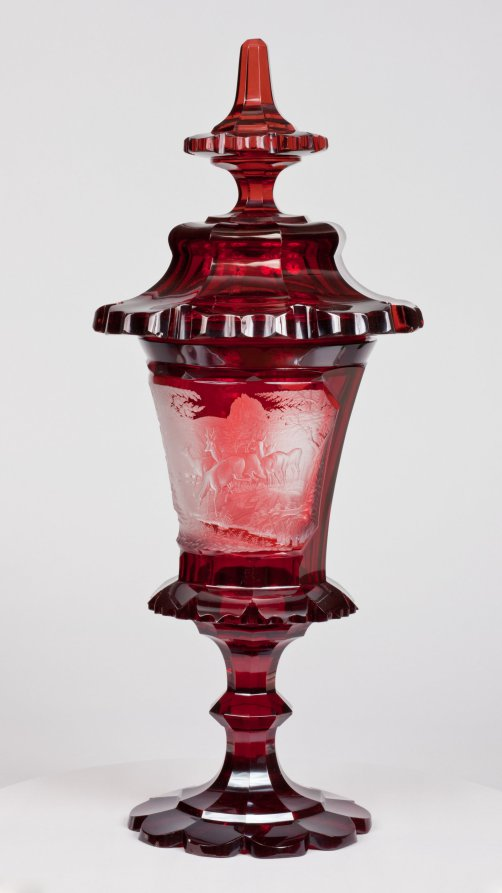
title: Covered Cup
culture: Bohemia, 19th century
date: mid-1800s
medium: ruby glass with engraved decoration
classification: Glass